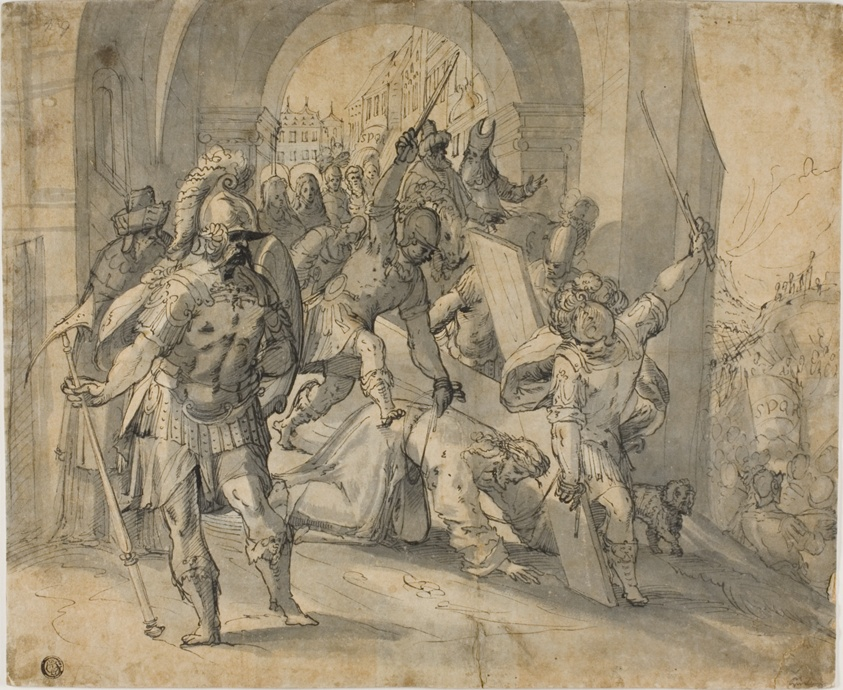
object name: Drawing and Watercolor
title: Christ Falling Under the Cross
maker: Possibly Caspar von Fraisinger (German, active 1581-1599); or Luca Giordano (Italian, 1632-1705); or after Giorgio Vasari (Italian, 1511-1574); or Caspar von Fraisinger (German, active 1581-1599); or Unknown Artist (German or Italian, 16th century)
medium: Pen and black ink, with brush and gray wash, on tan laid paper, laid down on brown laid card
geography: Germany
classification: ink or chalk wash; drawings (visual works); prints and drawing